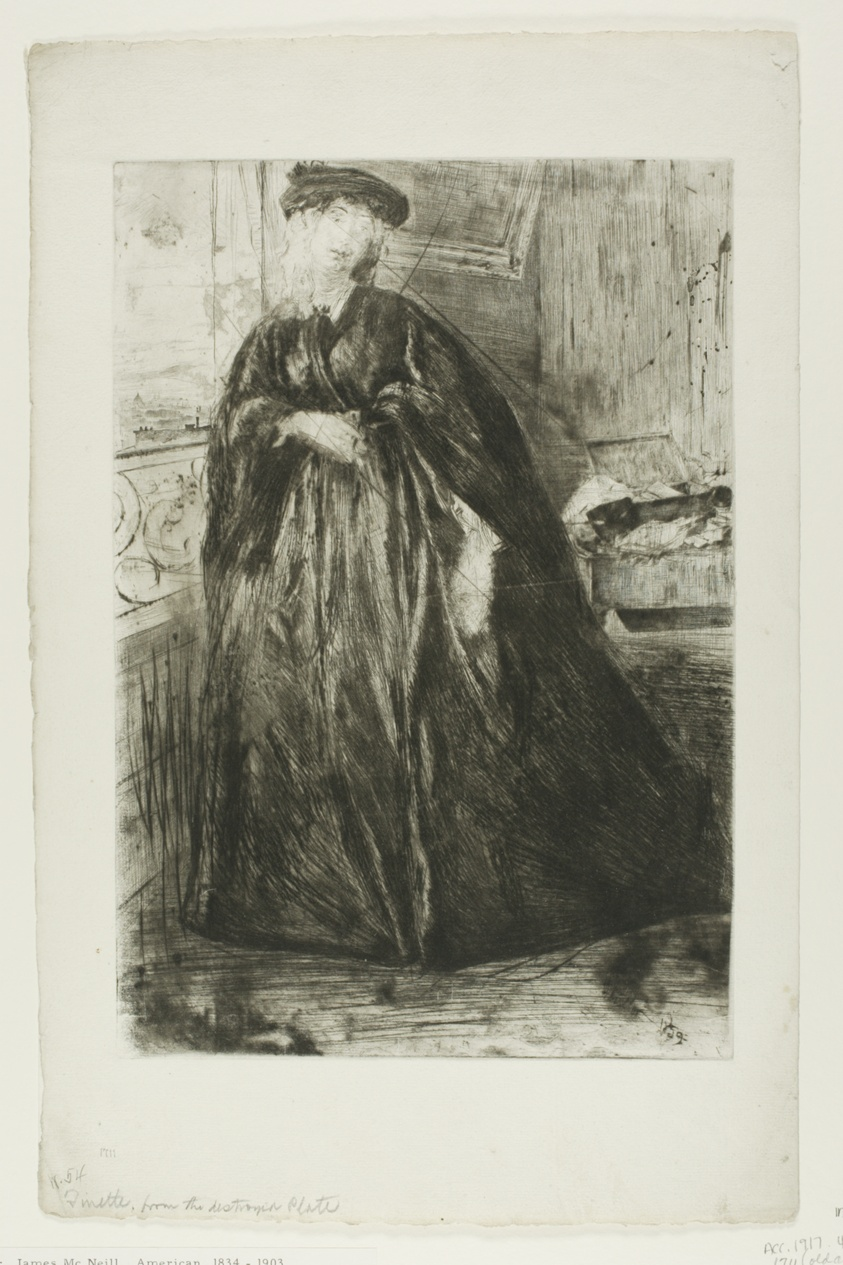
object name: Print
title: Finette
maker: James McNeill Whistler (American, 1834-1903)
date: 1859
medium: Etching and drypoint in black ink on ivory laid paper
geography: United States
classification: etching; drypoint; print; prints and drawing; paper